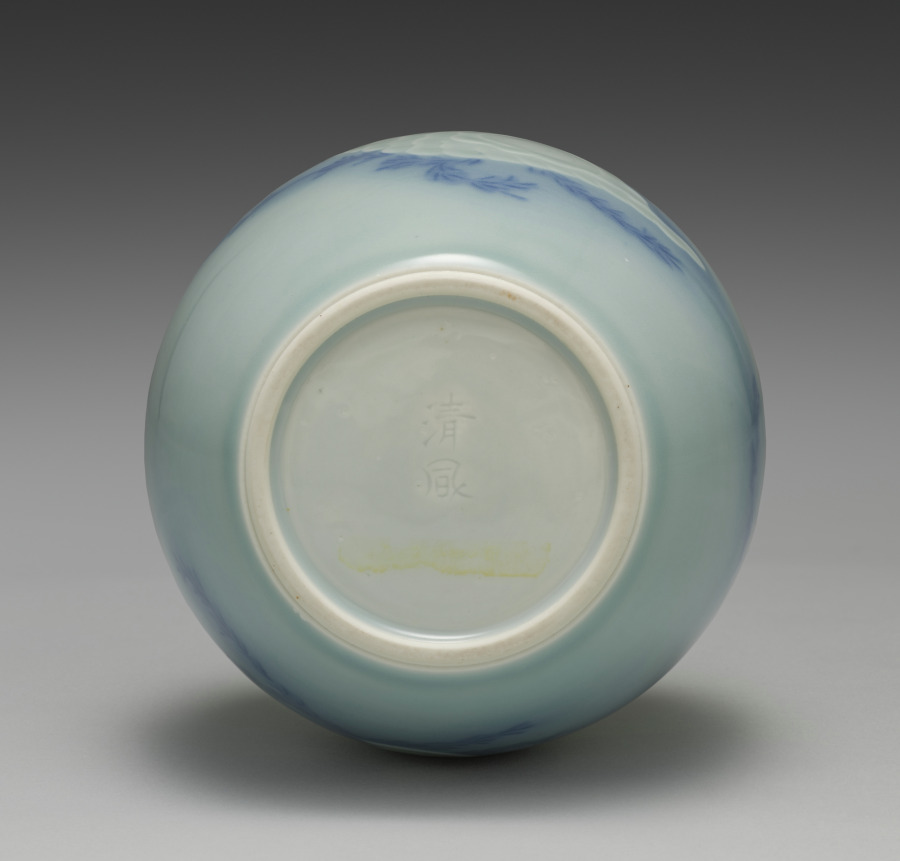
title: Water Container with Shell and Seaweed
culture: Japan, Meiji period (1868–1912) or Taishō period (1912–26)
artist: Seifū Yohei IV (Japanese, 1872–1951)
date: 1914–46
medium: Porcelain with underglaze blue, blue glaze and molded design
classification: Ceramic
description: Yohei IV chose an aquatic theme for this mizusashi. He applied clay to the surface and molded the shape of a large conch on one side and, on the other, a clam and a scallop. The finer details he incised into the surface of his low-relief shapes. He then painted seaweed as though it were coming out from behind the sea creatures, and he further set off the animals using a masking technique with a gradated blue surround. Finally, he applied a translucent blue glaze, identified on the box as mizusai, over the entire body of the vessel. The resulting effect is that one imagines having descended through the water to the ocean floor.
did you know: A mizusashi, water container, is an essential utensil for a tea ceremony.